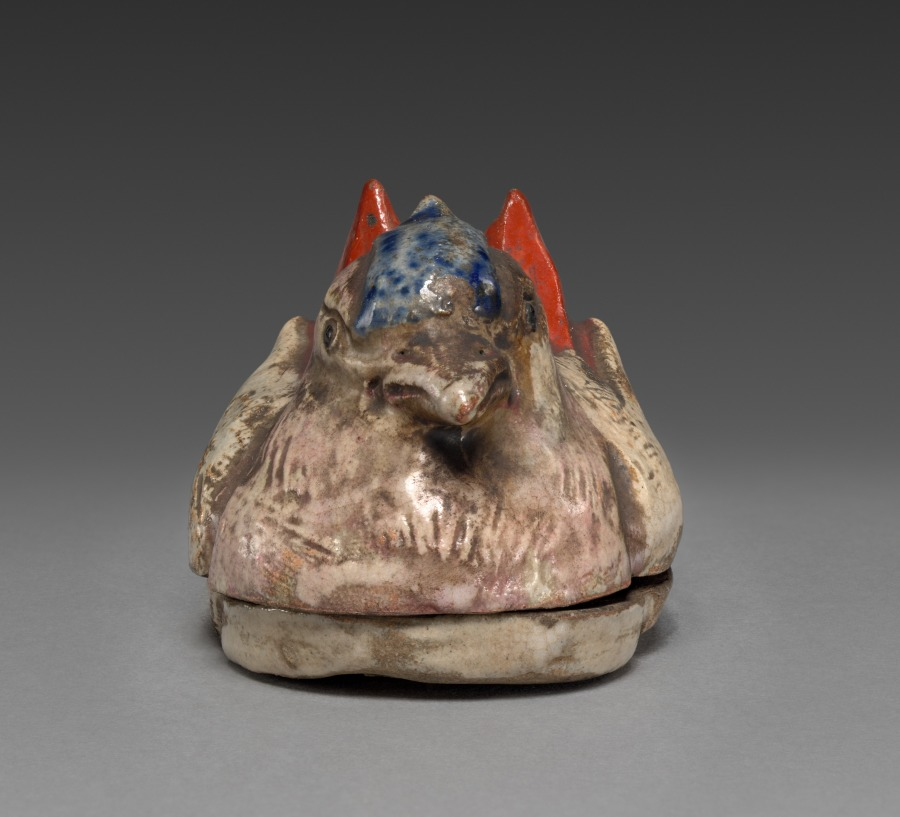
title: Incense Container (Kōgō) in the Shape of a Mandarin Duck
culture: Japan, Edo period (1615–1868)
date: c. 1700–1868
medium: Stoneware with glaze and incised decoration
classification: Ceramic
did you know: The artist incised the bird's feet on the bottom of the box.